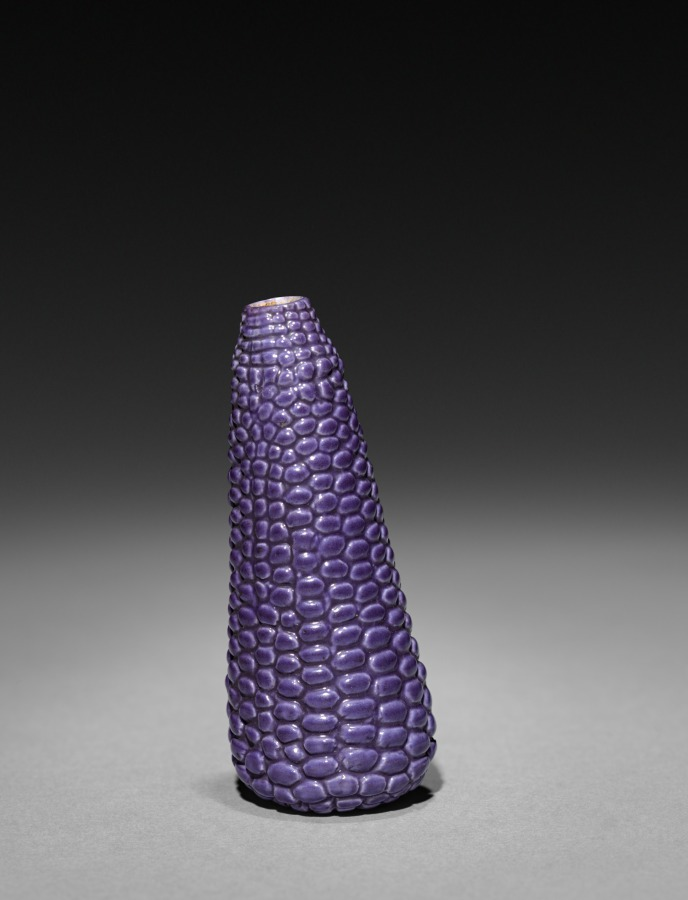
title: Snuff Bottle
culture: China, Qing dynasty (1644-1911)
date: 1644–1911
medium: glass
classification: Glass